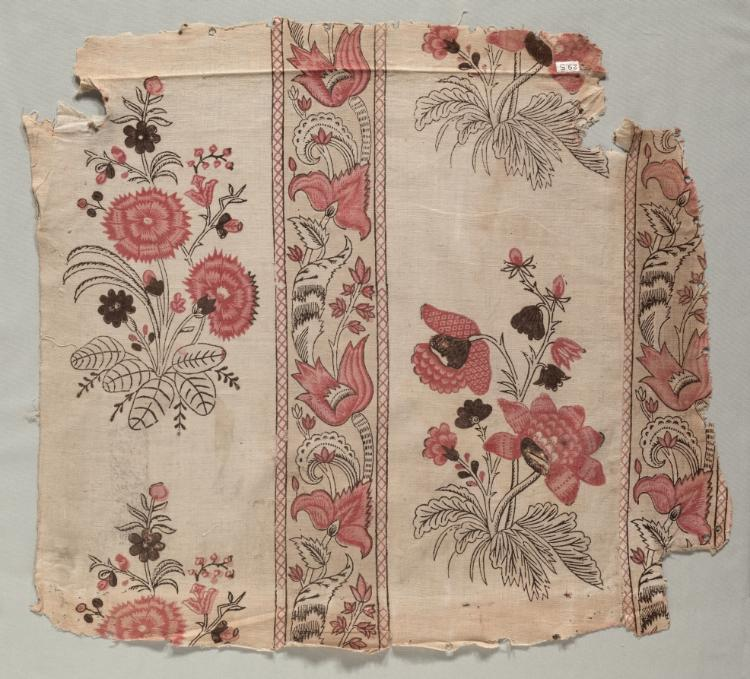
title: Fragment of Woodblock Printed Linen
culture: France, Beautiran ?, late 18th century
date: c. 1798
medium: woodblock print on linen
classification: Textile